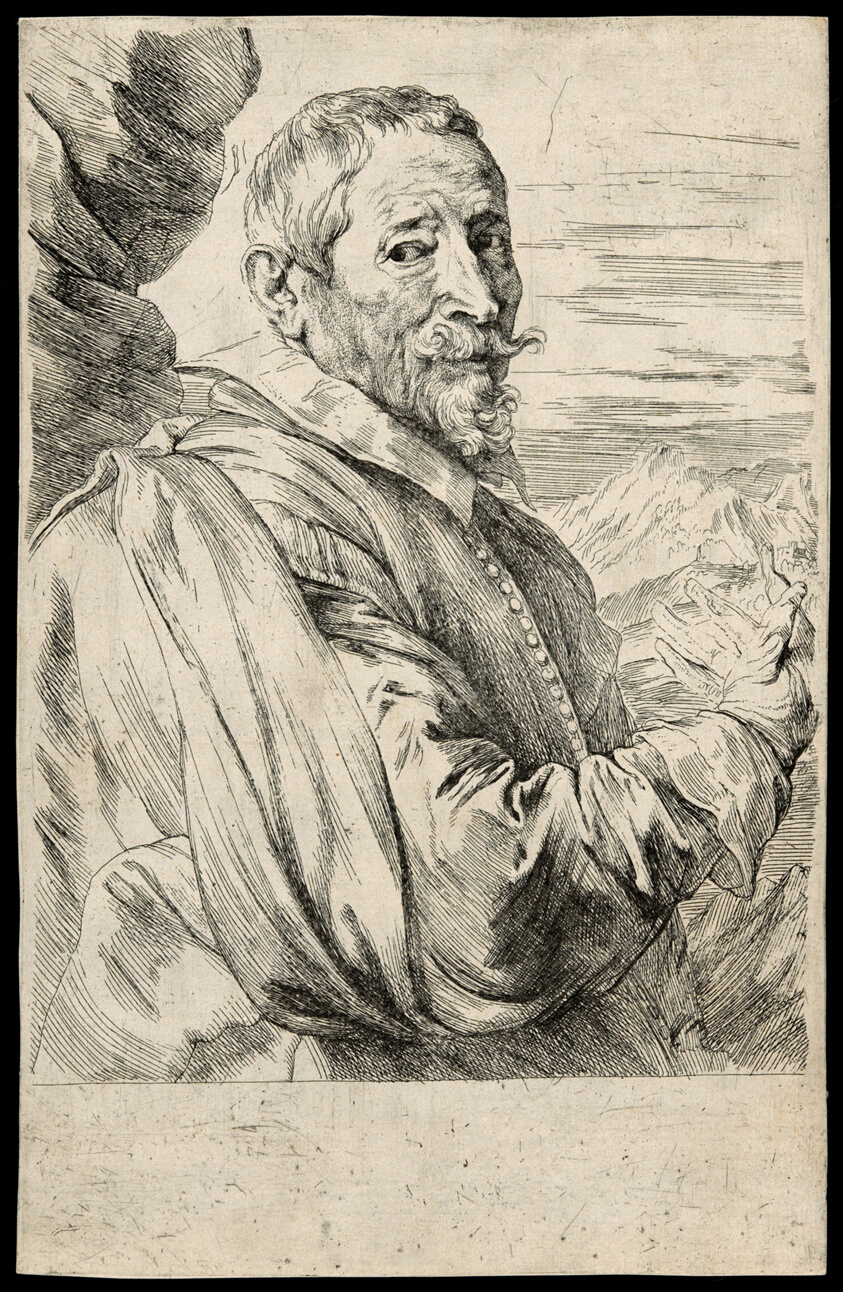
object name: Print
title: Joos de Momper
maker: Anthony van Dyck (Flemish, 1599-1641)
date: 1630/33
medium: Etching in black on ivory laid paper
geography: Flanders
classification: etching; print; prints and drawing